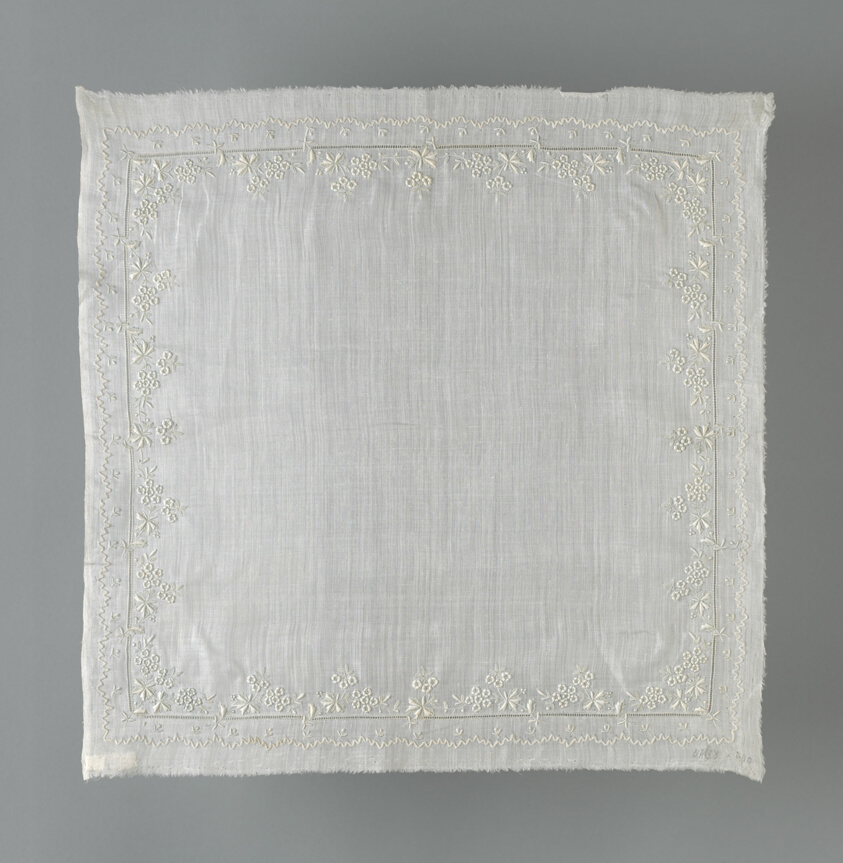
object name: Textile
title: Handkerchief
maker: Switzerland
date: 1892/1900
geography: Switzerland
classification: textile; weaving; accessories (object genre); needlework (visual works)